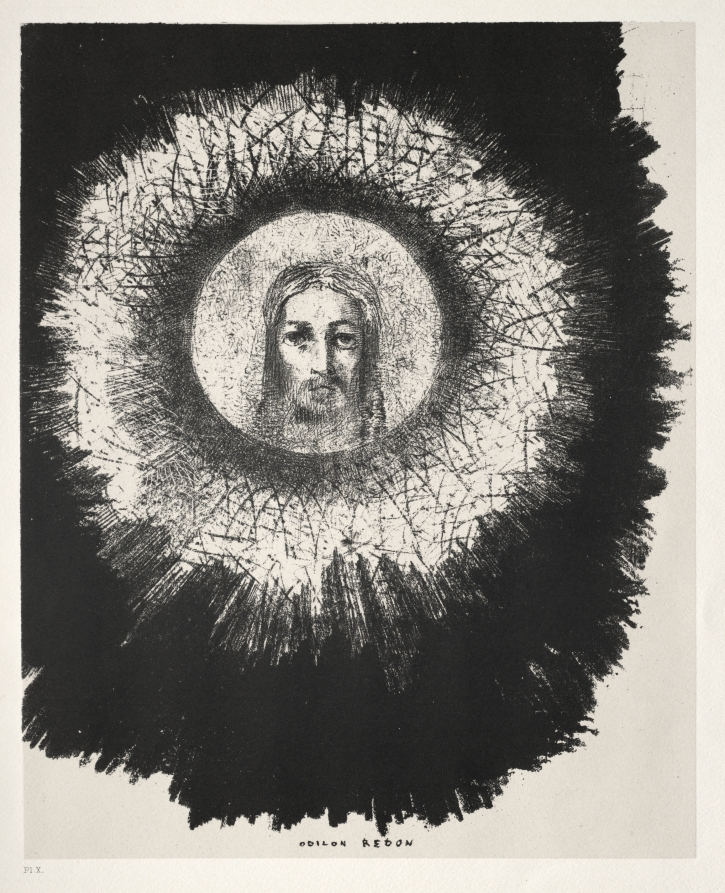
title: And In the Very Disk of the Sun Shines the Face of Jesus Christ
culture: France, 19th century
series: The Temptation of Saint Anthony (First Series)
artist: Odilon Redon (French, 1840–1916)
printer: Becquet (French)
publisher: Edmond Deman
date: 1888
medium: lithograph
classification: Print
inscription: printed at lower left, below image: Pl. X. / Et dans le disque même du soleil rayonne la face de Jésus-Christ.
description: This portfolio is one of three made by Odilon Redon inspired by avant-garde writer Gustave Flaubert’s novel The Temptation of Saint Anthony (1874). Captivated by the book’s fantastical account of moralizing tests encountered by a hermit in the desert, Redon executed charcoal drawings and attempted to evoke that medium’s dense blackness in his lithographs. Based on the text’s darkly imaginative tone rather than its actual content, the works in this series present invented monsters and figures in otherworldly settings with jarring tonal variations. Although Redon felt that the prints effectively translated the surreal universe of his source material, they were largely misunderstood in his own time.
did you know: Publisher Edmond Deman commissioned this portfolio after he saw an 1886 exhibition of Redon's work in Brussels, Belgium.